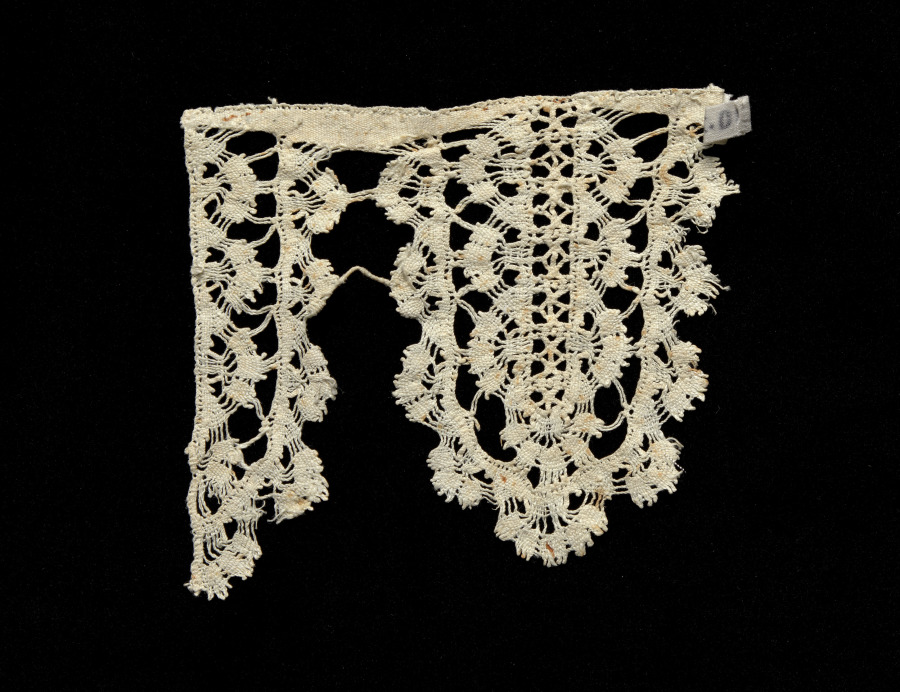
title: Lace Point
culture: Italy, Abruzzo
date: 1600s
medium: Bobbin lace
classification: Lace